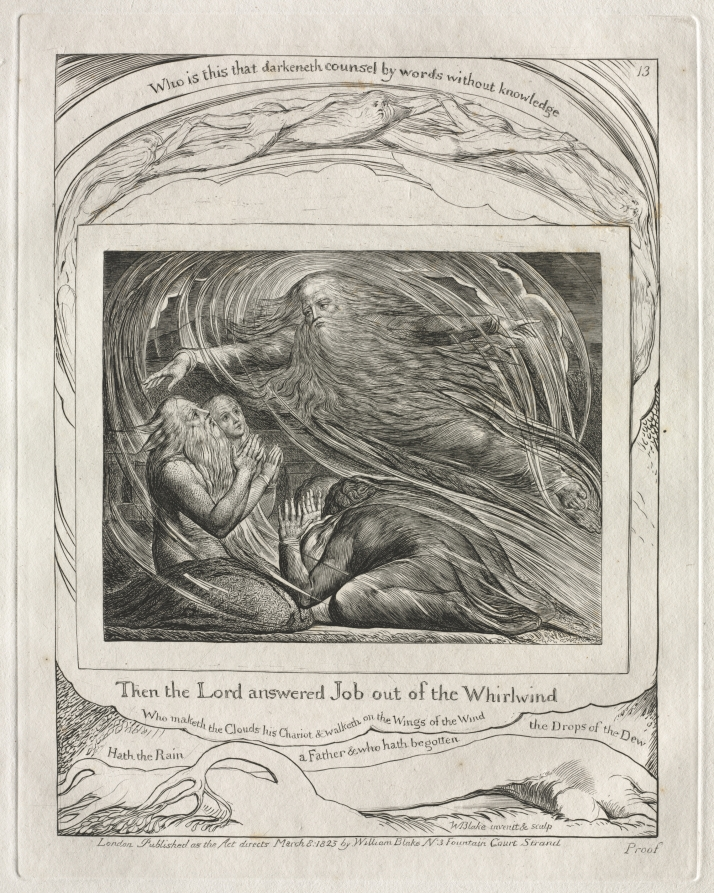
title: The Book of Job: Pl. 13, Then the Lord answered Job out of the Whirlwind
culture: England, 18th century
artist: William Blake (British, 1757–1827)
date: 1825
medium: engraving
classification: Portfolio